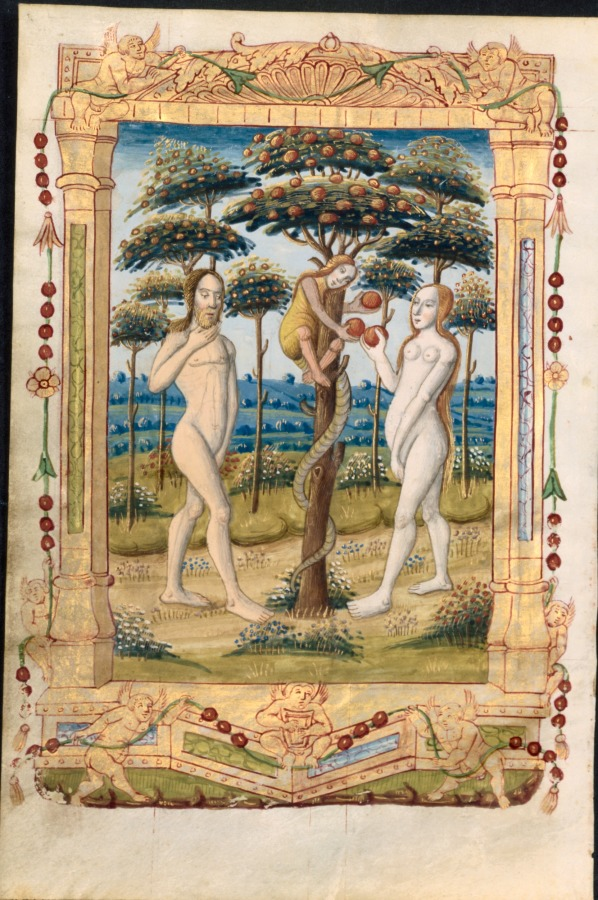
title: Leaf from a Book of Hours: Adam and Eve and the Fall of Man (Prefatory Miniature to the Office of the Virgin) (recto) and Text with Illustrated Border (verso) (1 of 3 Excised Leaves)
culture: France, Rouen, 16th century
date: c. 1510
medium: ink, tempera, and liquid gold on vellum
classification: Manuscript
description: This leaf came from a highly customized and lavish book of hours made in Rouen, a major center for book production at the time. Intended for a female patron, the book, of which the museum owns three leaves, contained numerous illuminations. Shown here are Adam and Eve, the first man and woman, just before disobeying God by eating fruit from the forbidden tree of knowledge in the Garden of Eden, considered the first sin in Christianity. This precedes the Hours of the Virgin’s traditional first scene of the Annunciation. Its inclusion emphasizes a need for redemption through recitation of the subsequent prayers.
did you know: This image opens to what is the heart of every book of hours, the Hours of the Virgin, a set of prayers in which the reader asked the Virgin Mary to intercede on their behalf.